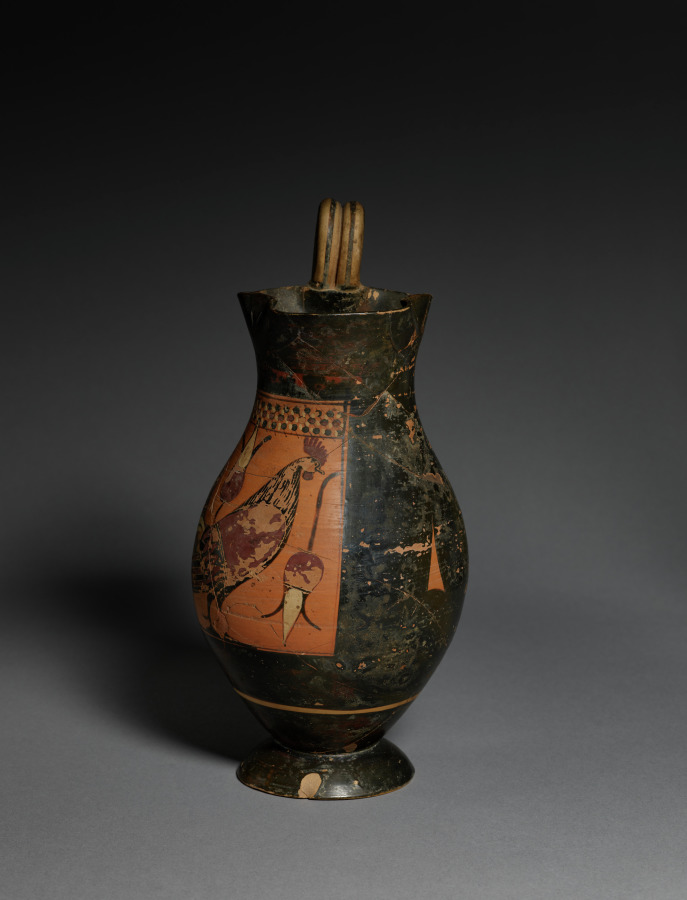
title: Black-Figure Olpe (Wine Jug): Rooster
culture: Greek, Middle/Late Corinthian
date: c. 575 BCE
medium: ceramic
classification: Ceramic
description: Although this wine jug, simply decorated with a rooster and two lotus blossoms, looks much like Athenian vases, it was made in Corinth. The paler buff color of the Corinthian clay can be seen on the handle and in some areas of loss, but the background of the decorated area has been covered with a red slip imitating the reddish, iron-rich Attic (or Athenian) clay. On the back of the vase, two reserved (red) crescent shapes may represent eyes, like those painted in much more detail on many drinking cups of this period.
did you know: Roosters appear frequently on vases—alone, in cock fights, and as love gifts.